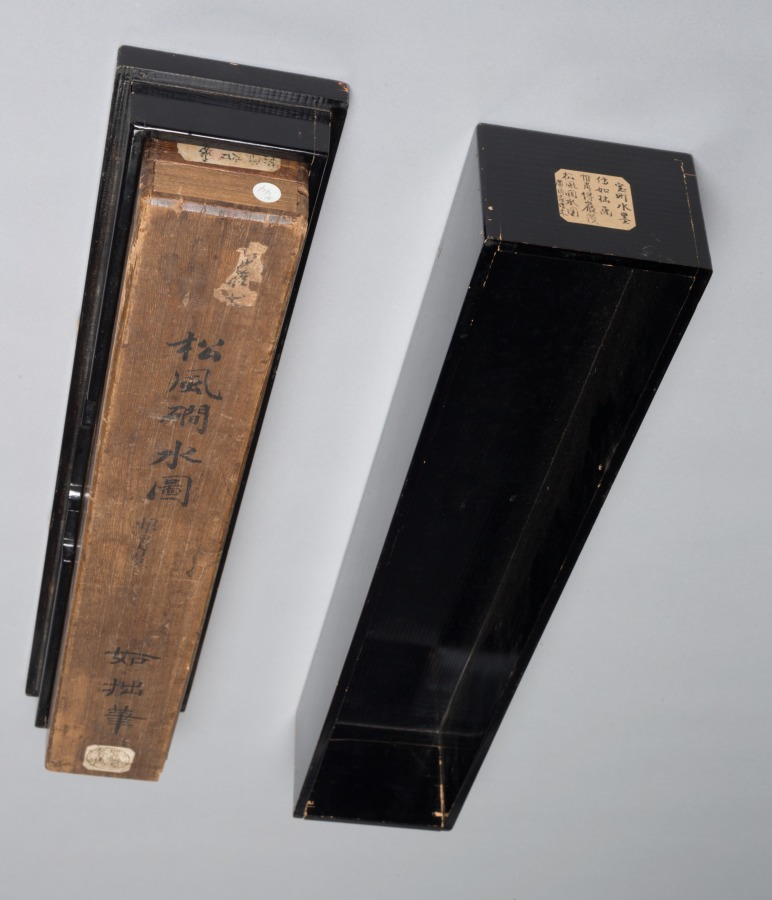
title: Landscape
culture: Japan, possibly Edo period (1615-1868)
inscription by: copy after Ishō Tokugan (Japanese, c. 1359–1437)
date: early 1600s to mid-1800s?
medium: hanging scroll; ink and slight color on paper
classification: Painting